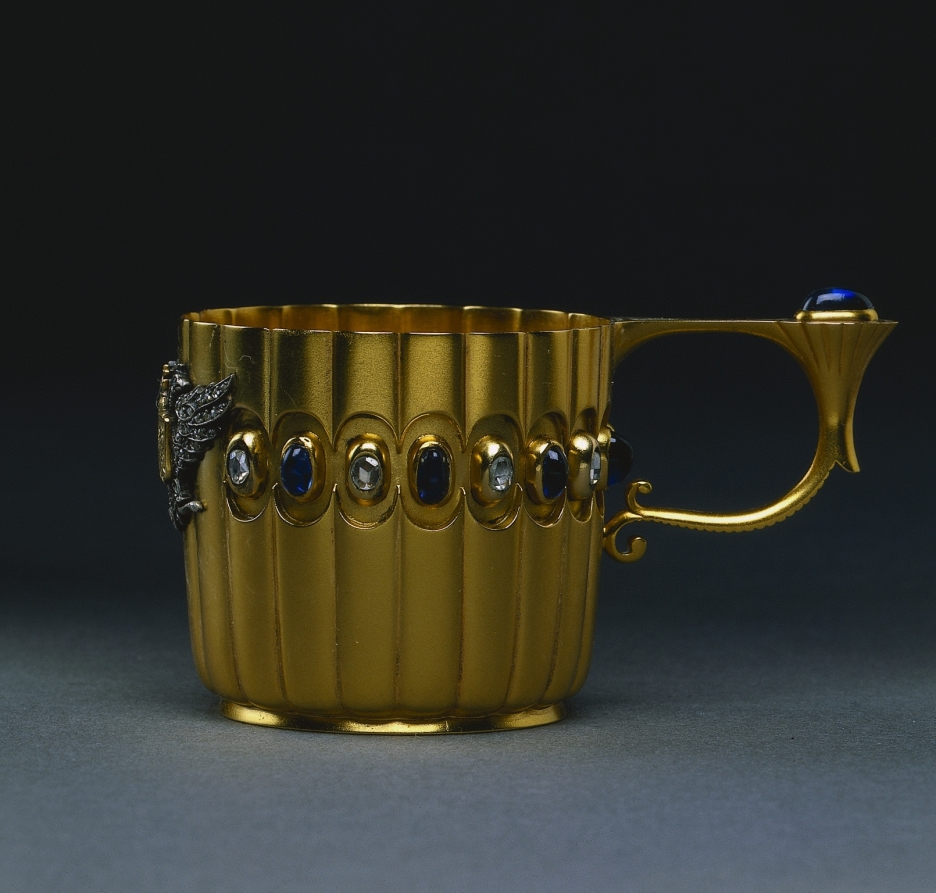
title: Miniature Cup (Kovsh)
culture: Russia, St. Petersburg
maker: House of Fabergé (Russian, 1842–1918)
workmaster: Mikhail Evlampievich Perkhin (Russian, 1860–1903)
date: c. 1886–1896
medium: gold, diamonds, sapphires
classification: Metalwork